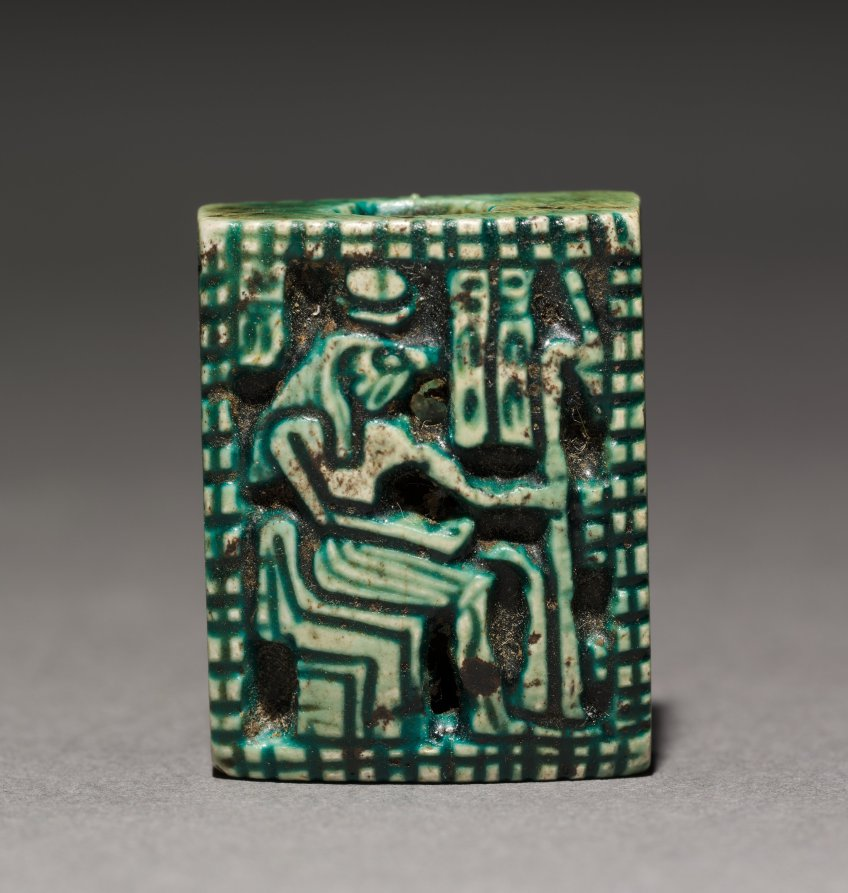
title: Double-Sided Plaque Amulet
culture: Egypt, Third Intermediate (1069–715 BCE)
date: 1069–715 BCE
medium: green-glazed steatite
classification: Amulets